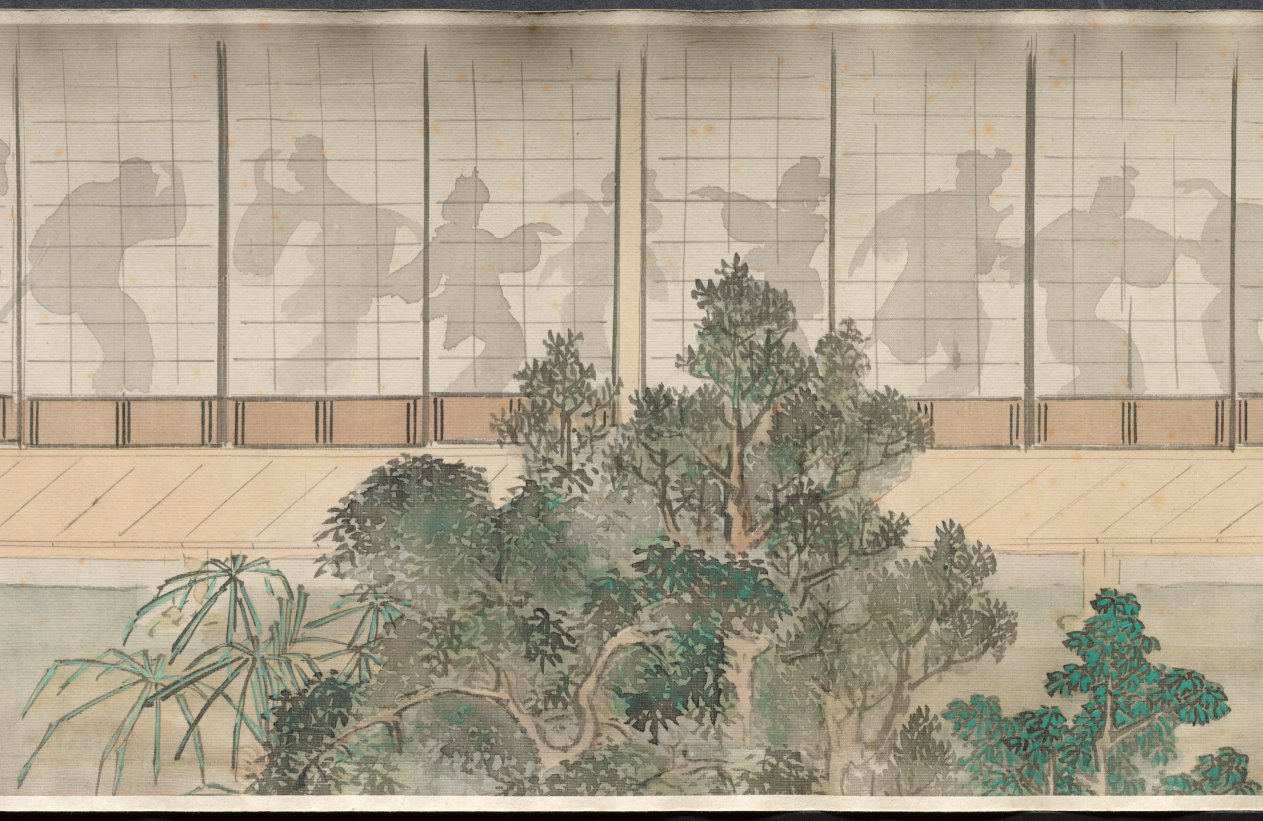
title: The Shadow Dancers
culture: Japan, Edo period (1615–1868)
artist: Yamamoto Baiitsu (Japanese, 1783–1856)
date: 1800s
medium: handscroll, ink and color on silk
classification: Painting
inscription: artist's signature and two seals at end of painting.